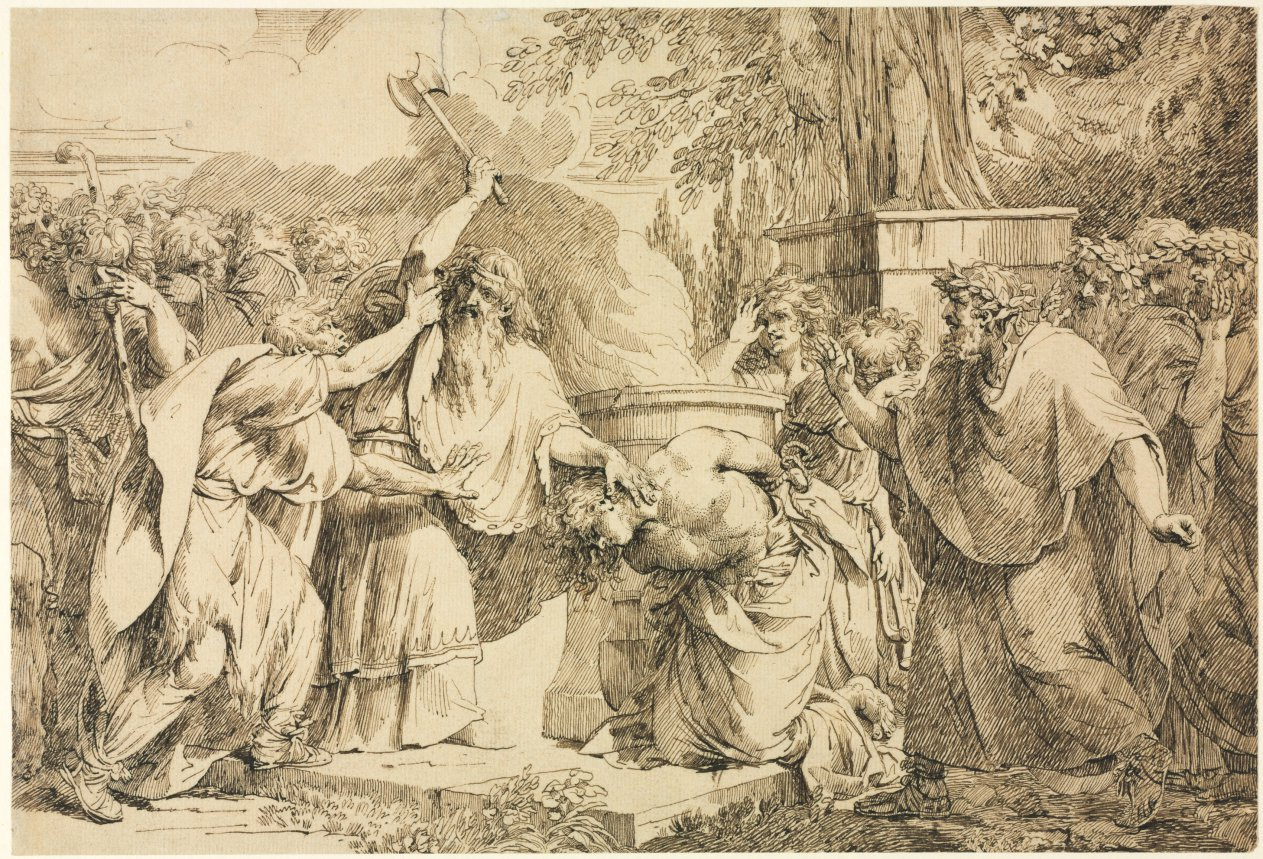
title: A Sacrifice Interrupted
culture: England, 18th century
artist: John Hamilton Mortimer (British, 1740–1779)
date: 1770s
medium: pen and brown ink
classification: Drawing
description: One of the most talented draftsmen of his generation in England, John Hamilton Mortimer became known for a style of drawing in pen and ink that was bold, confident, and energetic. This sheet depicts a large crowd in a frieze-like arrangement gathered to witness a figure with an axe on the verge of decapitating a young male captive. Mortimer deliberately sought out obscure narratives and leaned toward the violent and macabre. In spite of the research of numerous art historians, the specific subject of the drawing has yet to be identified.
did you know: John Hamilton Mortimer's close friend James Gandon described Mortimer's technique: "He never altered a line . . . and all the time he [worked] he conversed and entertained his friends with the same easy cheerfulness and pleasantry as if wholly unemployed."